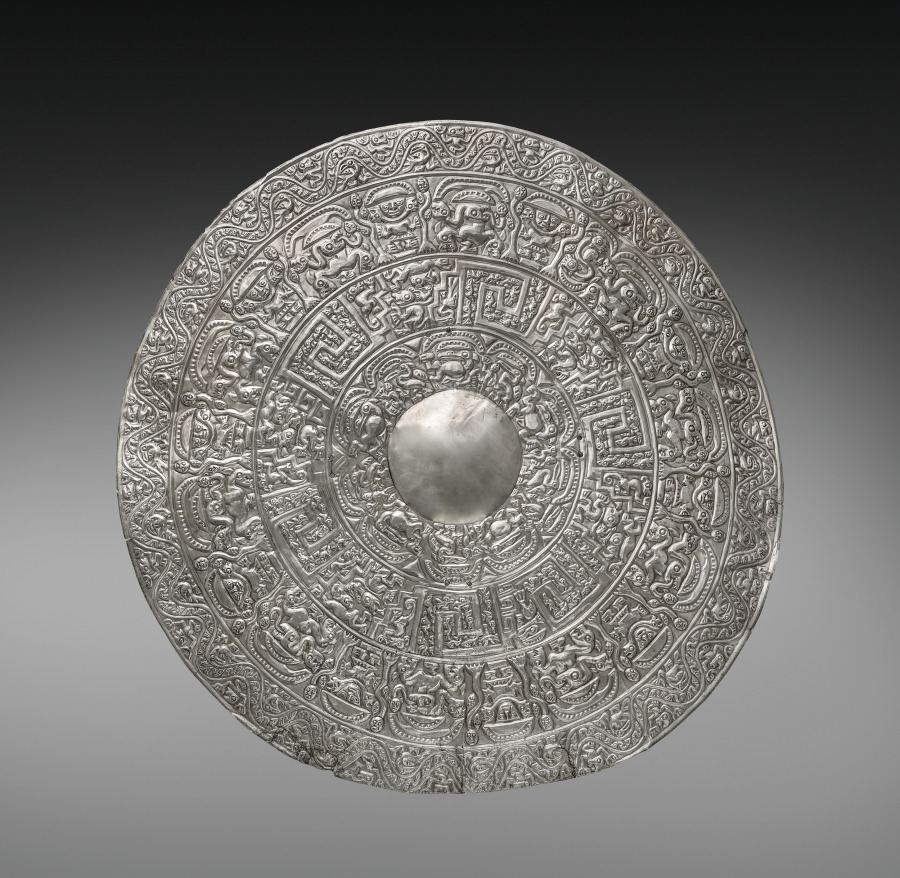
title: Disk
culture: Central Andes, Lambayeque or Chimú people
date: 850–1460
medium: Silver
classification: Silver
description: This disk belongs to a group of more than 20 similar disks pierced for attachment to a backing. The disks fall into four groups based on imagery. Here, each band features two alternating motifs: a human and a bird; a human and a zoomorphic creature; two geometric motifs, one filled with animals and the other with tiny birds; and two birds.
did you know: This disk could have been attached to a banner or a ceremonial shield.